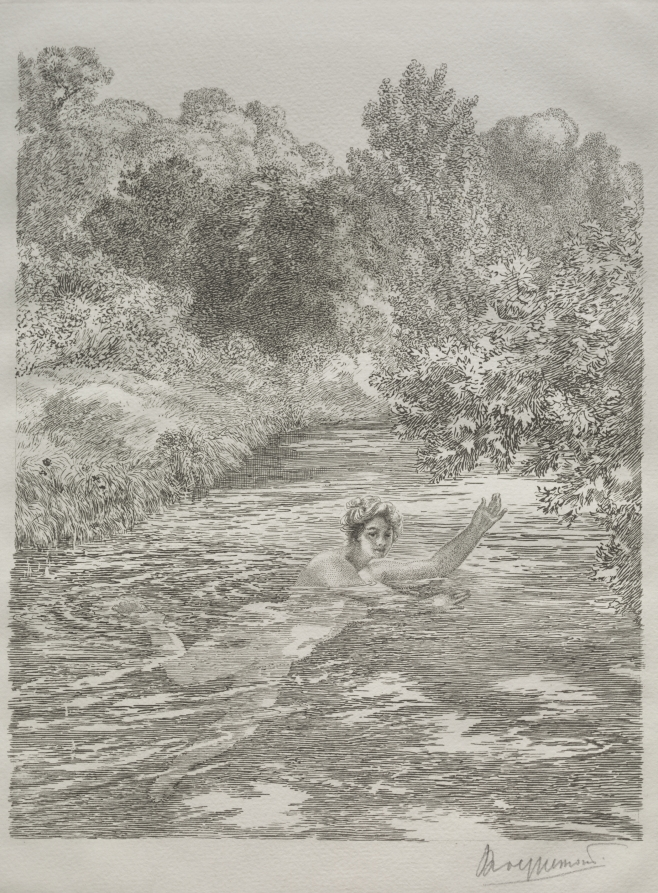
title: The Bather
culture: France, 19th century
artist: Félix Bracquemond (French, 1833–1914)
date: c. 1860–70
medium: etching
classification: Print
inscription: signed, lower right, in graphite: Bracquemond